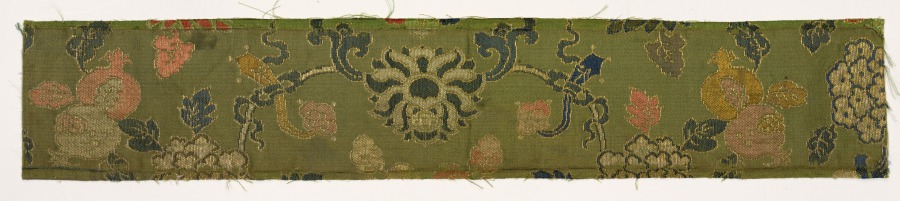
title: Fragment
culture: China, 19th century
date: 1800s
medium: silk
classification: Textile